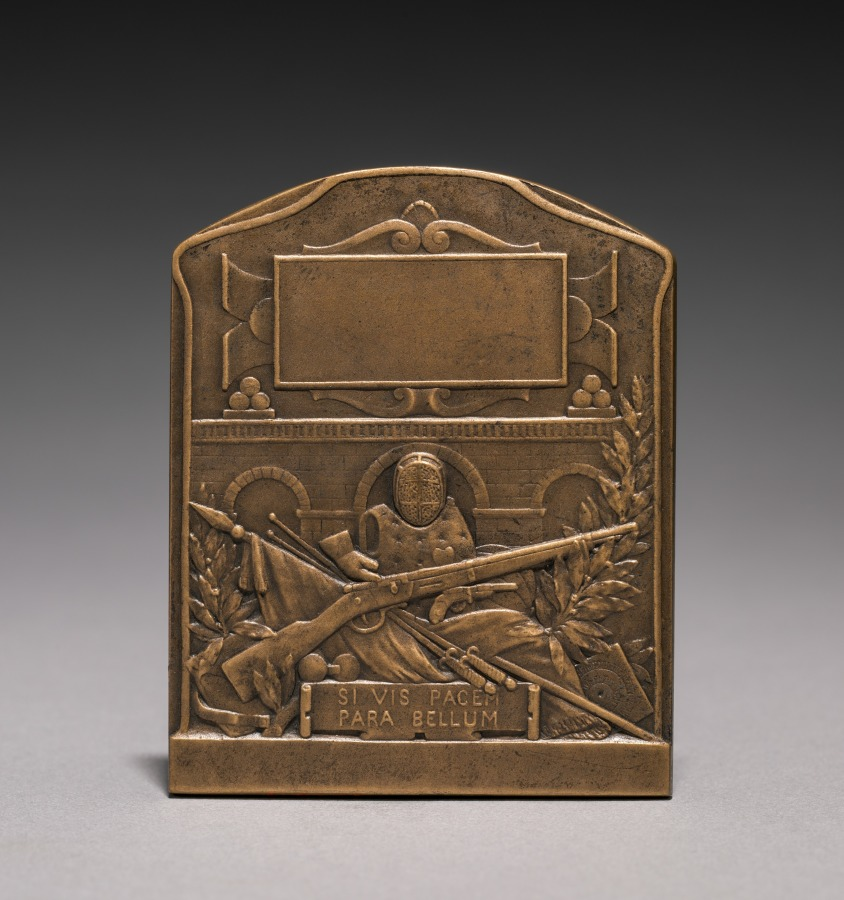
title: Medal (reverse)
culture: France, 20th century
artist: Emile André Boisseau (French, 1842–1923)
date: 1914–1918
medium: bronze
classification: Metalwork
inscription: "si vis pacem para bellum."